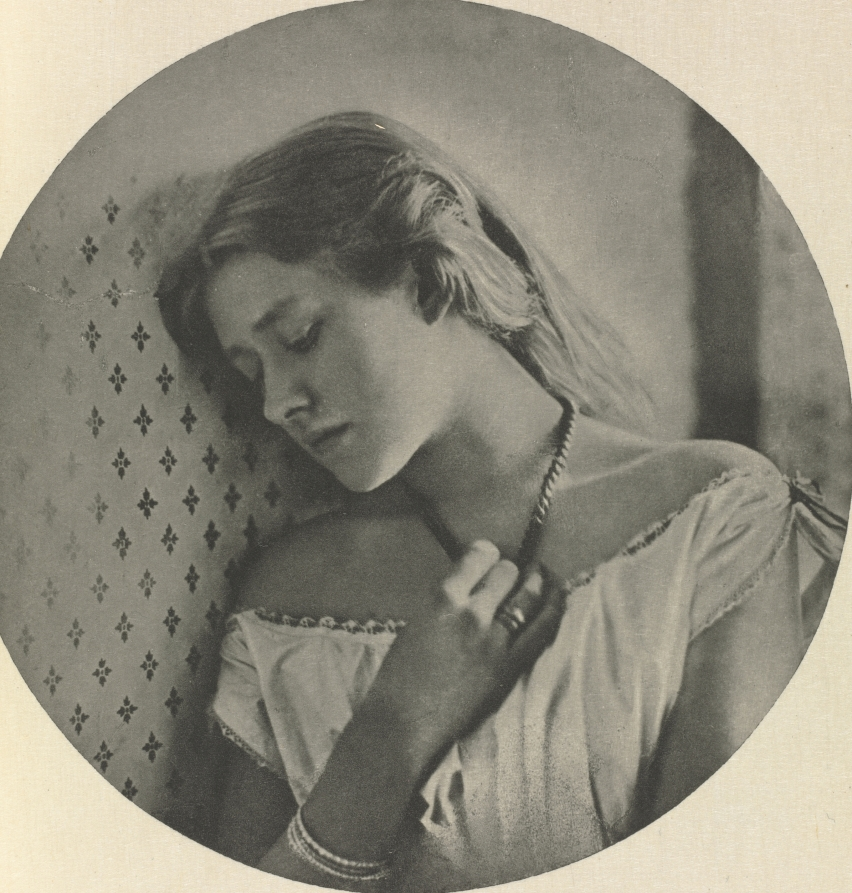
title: Ellen Terry, at the Age of Sixteen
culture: England, 20th century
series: Camera Work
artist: Julia Margaret Cameron (British, 1815–1879)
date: 1913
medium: photogravure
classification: Bound Volume